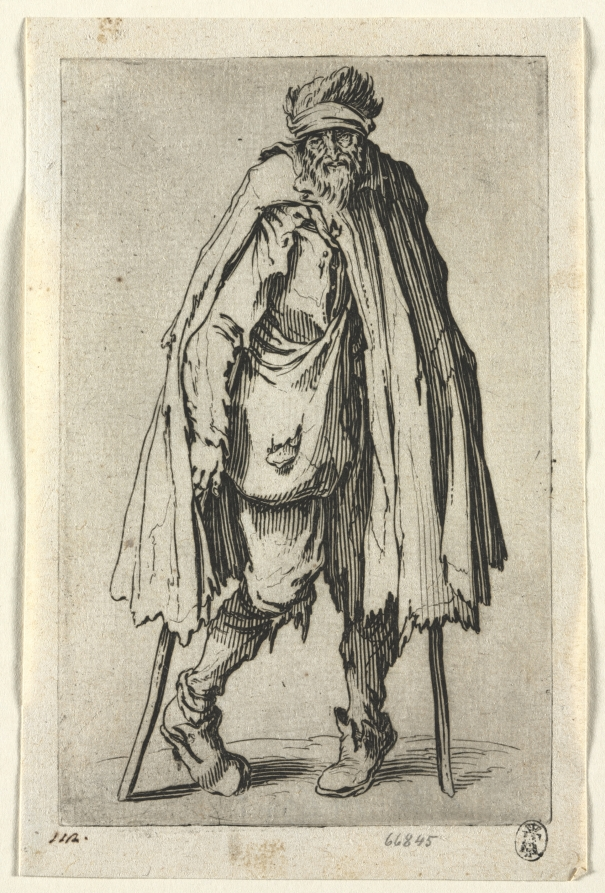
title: The Beggars: Beggar on Crutches with a Bag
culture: France, 17th century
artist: Jacques Callot (French, 1592–1635)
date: c. 1623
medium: etching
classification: Print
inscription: Inscribed lower left in pen and brown ink: "112."